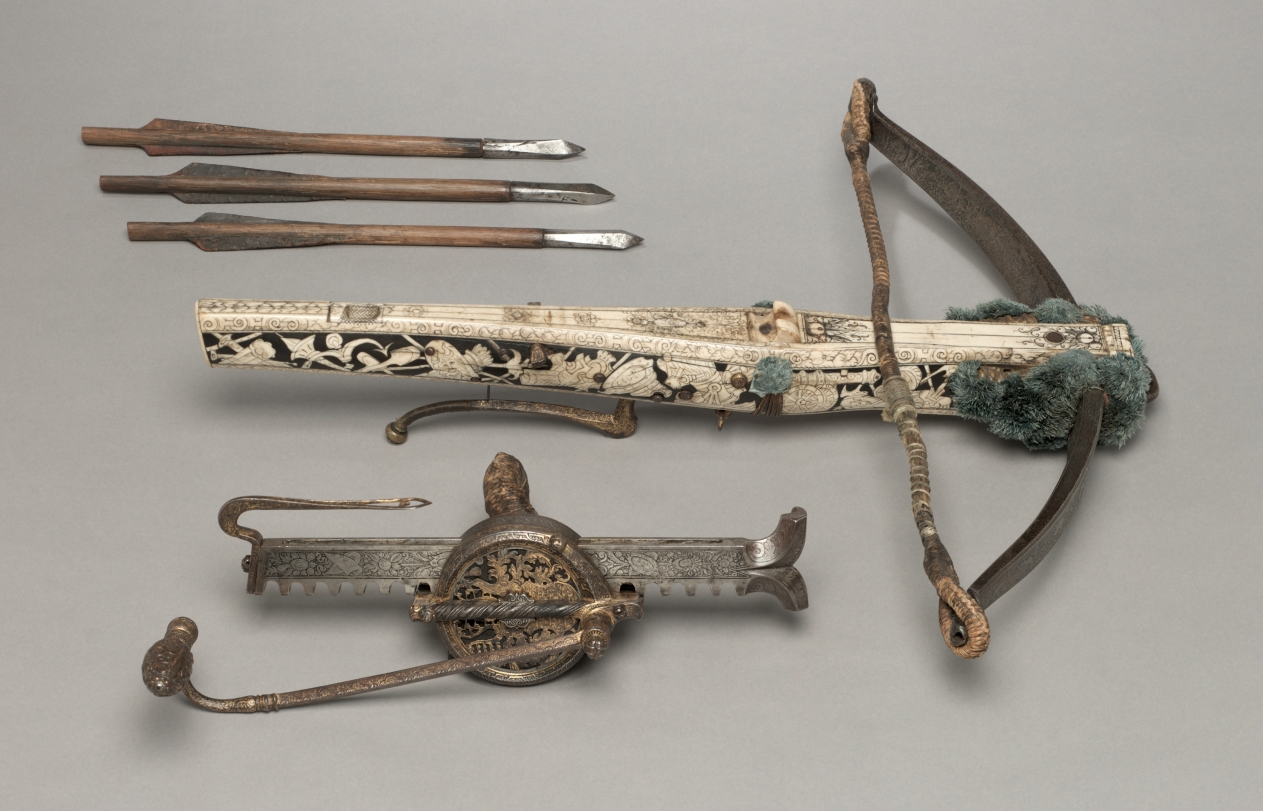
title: Crossbow Bolt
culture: Germany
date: 1500s–1600s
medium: wood, leather, steel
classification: Arms and Armor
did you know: Bolts with leather feathering were used mainly in the Tyrolean area, which includes northern Italy and western Austria.